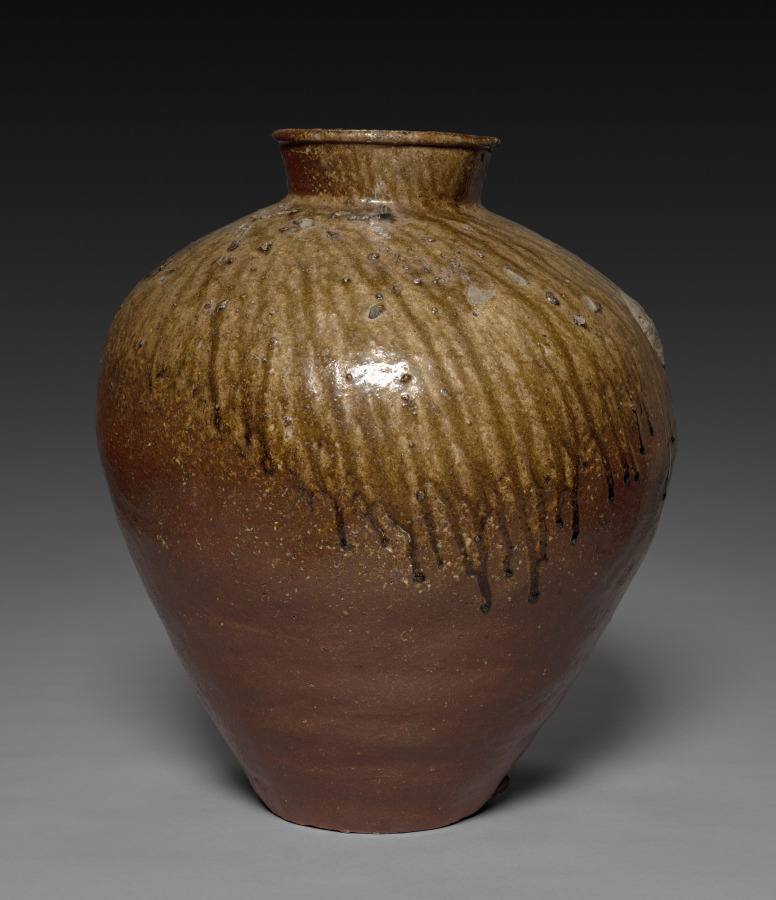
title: Storage Jar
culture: Japan, Muromachi period (1392–1573)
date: 1400s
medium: Stoneware with natural ash glaze (Echizen ware)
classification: Ceramic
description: Located in present-day Fukui prefecture northeast of Kyoto, the Echizen kilns produced ceramics with purplish-red skin flecked with white feldspar characteristic of the local clay used in this piece. Around 1700, the warm hue of Echizen wares gained popularity in tea practice, particularly when the vessels exhibited the rugged surface evident here in combination with the dynamic glossy glaze drips.